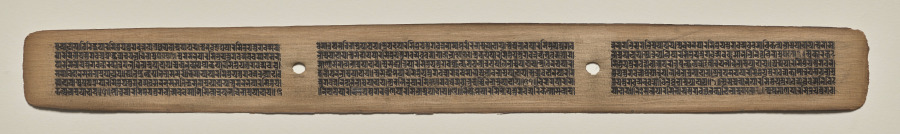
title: Text, Folio 72 (recto), from a Manuscript of the Perfection of Wisdom in Eight Thousand Lines (Ashtasahasrika Prajnaparamita-sutra)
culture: Eastern India, Bihar, Vikramashila Monastery. Painting: Nepal, Kathmandu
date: Sunday, September 14, 1119 (year 239 of the Newar Samvat in the month of Ashvina)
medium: gum tempera and ink on palm leaves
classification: Painting